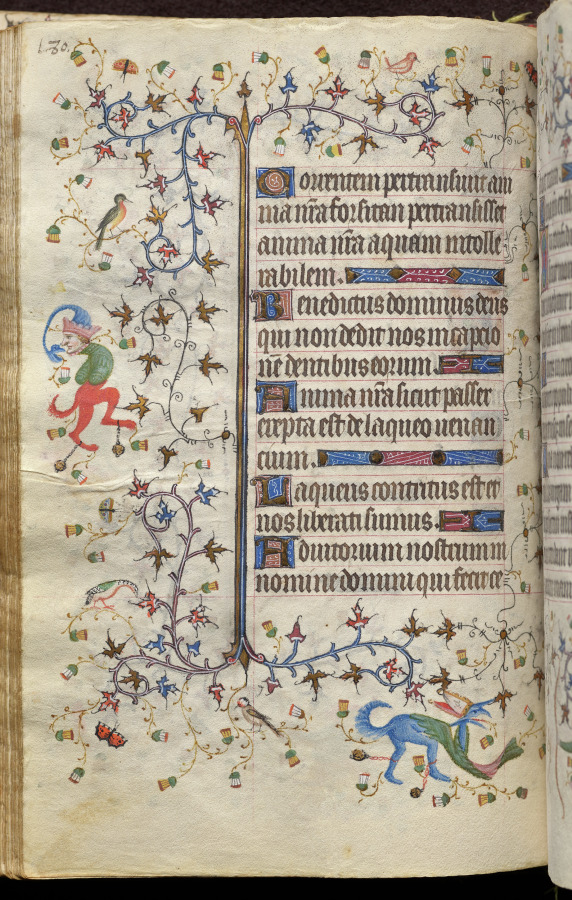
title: Hours of Charles the Noble, King of Navarre (1361-1425): fol. 90v, Text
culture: France, Paris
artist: Master of the Brussels Initials and Associates (French)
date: c. 1405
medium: ink, tempera, and gold on vellum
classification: Bound Volume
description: This precious volume was obviously highly prized by its owner, the French-born King of Navarre, who had his coat of arms painted on no less than twenty folios. Rather than directly commissioning this manuscript from a specific workshop, it seems that Charles the Noble acquired his book of hours -- perhaps ready-made for the luxury market -- while on a trip to Paris in 1404-05. A collaborative effort, six painting styles are evidenced within the pages of this codex, those of two Italians, two Frenchmen, and two Netherlanders. The painter who was responsible for the planning and decoration of the book, and who produced seventeen of the large miniatures, was a Bolognese artist known as the Master of the Brussels Initials. His principal assistant, responsible for most of the borders, was a Florentine who signed his name "Zecho" da Firenze on folio 208 verso.